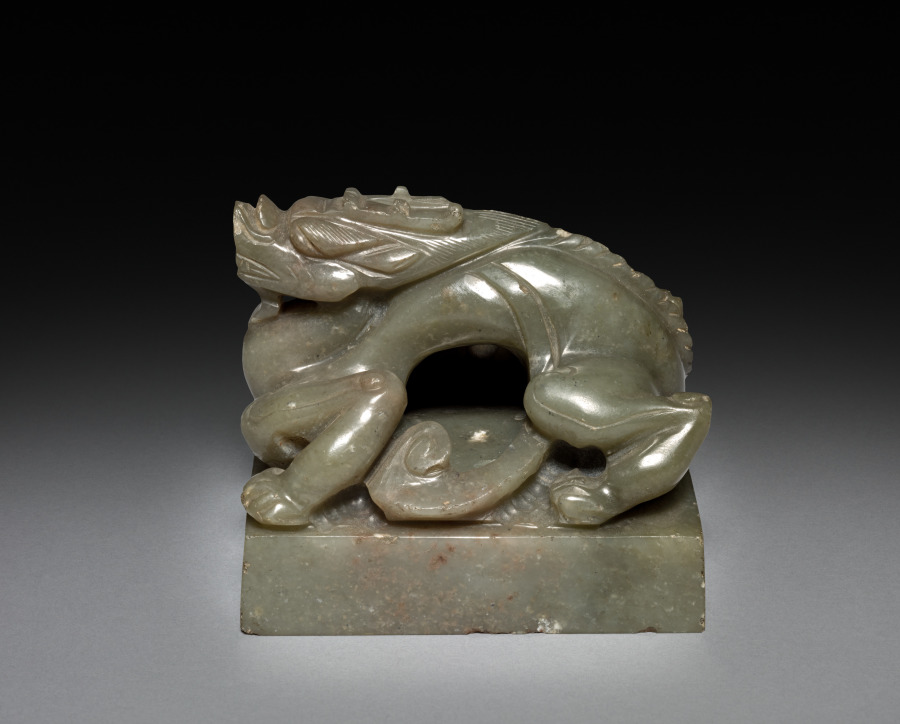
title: Seal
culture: China, Qing dynasty (1644-1911)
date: 1700 or later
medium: Jade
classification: Jade